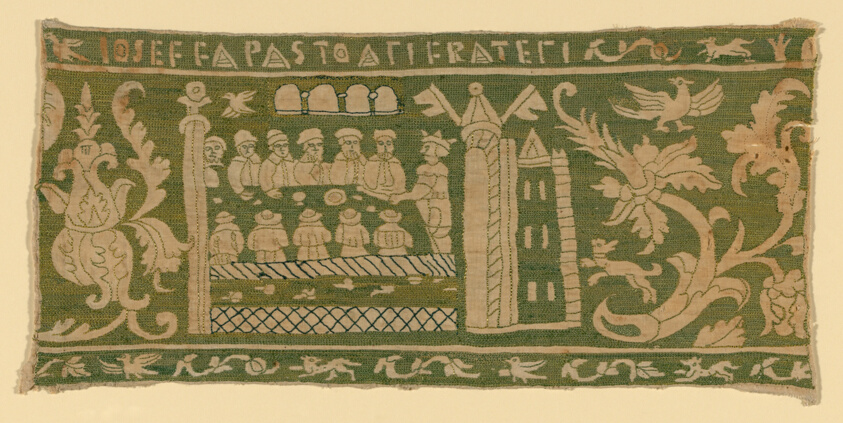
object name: Textile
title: Fragment (From a Border)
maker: Italy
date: 1575/1625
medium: Linen, plain weave; embroidered with silk floss in back and long-armed cross stitches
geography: Italy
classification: textile; needlework (visual works)